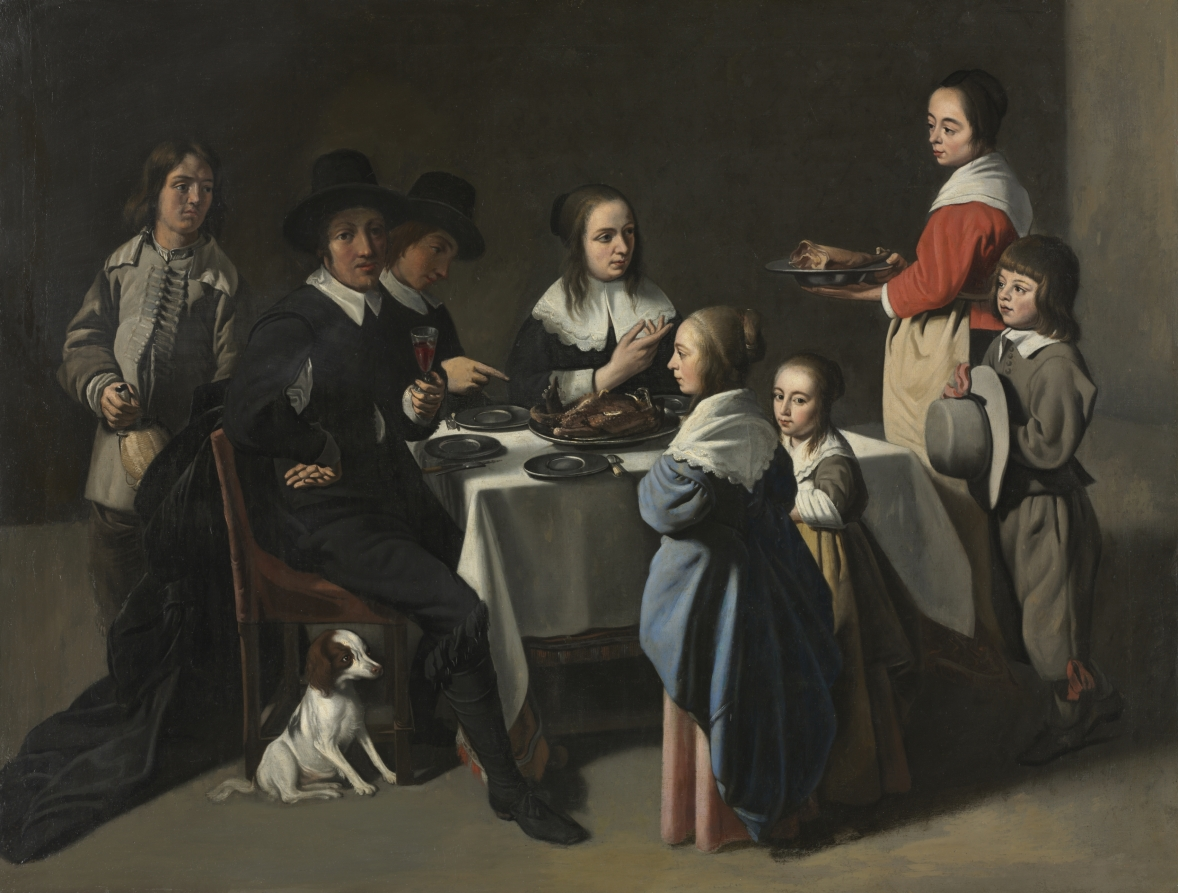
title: A Family Meal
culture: France, 17th century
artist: Le Nain family (French)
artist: after Le Maître des Jeux (French)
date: c. 1645–55 or later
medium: oil on canvas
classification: Painting